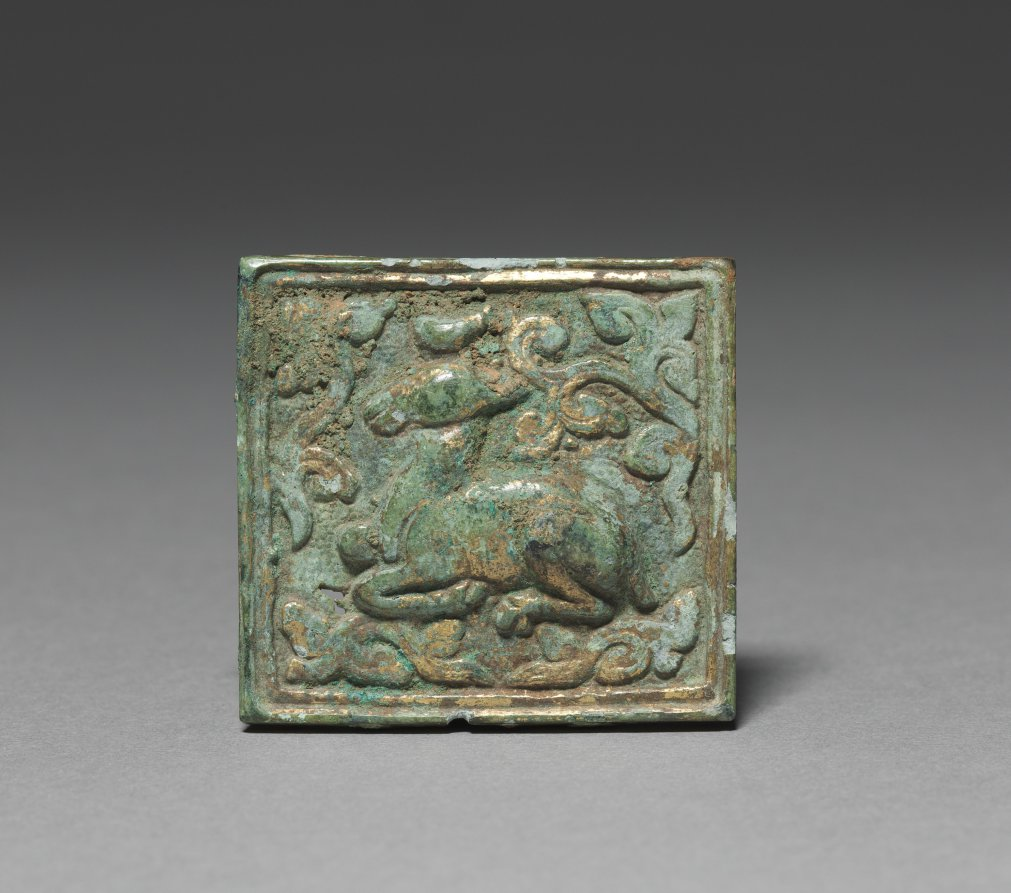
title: Belt Ornament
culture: Korea, Goryeo dynasty (918–1392)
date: 1100s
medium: gilt bronze with repoussé relief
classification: Metalwork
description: Metallurgy advanced remarkably in the Goryeo period (918-1392), explaining why a large quantity of sophisticated metal artifacts with delicate designs were used not only as daily accessories but also as burial goods. Belt ornaments like this example were fixed to leather belts. Surround by intricate arabesque patterns, a seated dear was done in the repoussé technique. Such animal motifs were widely shared among Eastern Eurasian tribes, from where the first settlers in the Korean peninsula originated.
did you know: The Japanese antique dealer Yamanaka & Company, which opened its branches in New York (1895) and Boston (1899), sold small Korean archaeological materials such as this belt ornament to American collectors in the early 20th century.